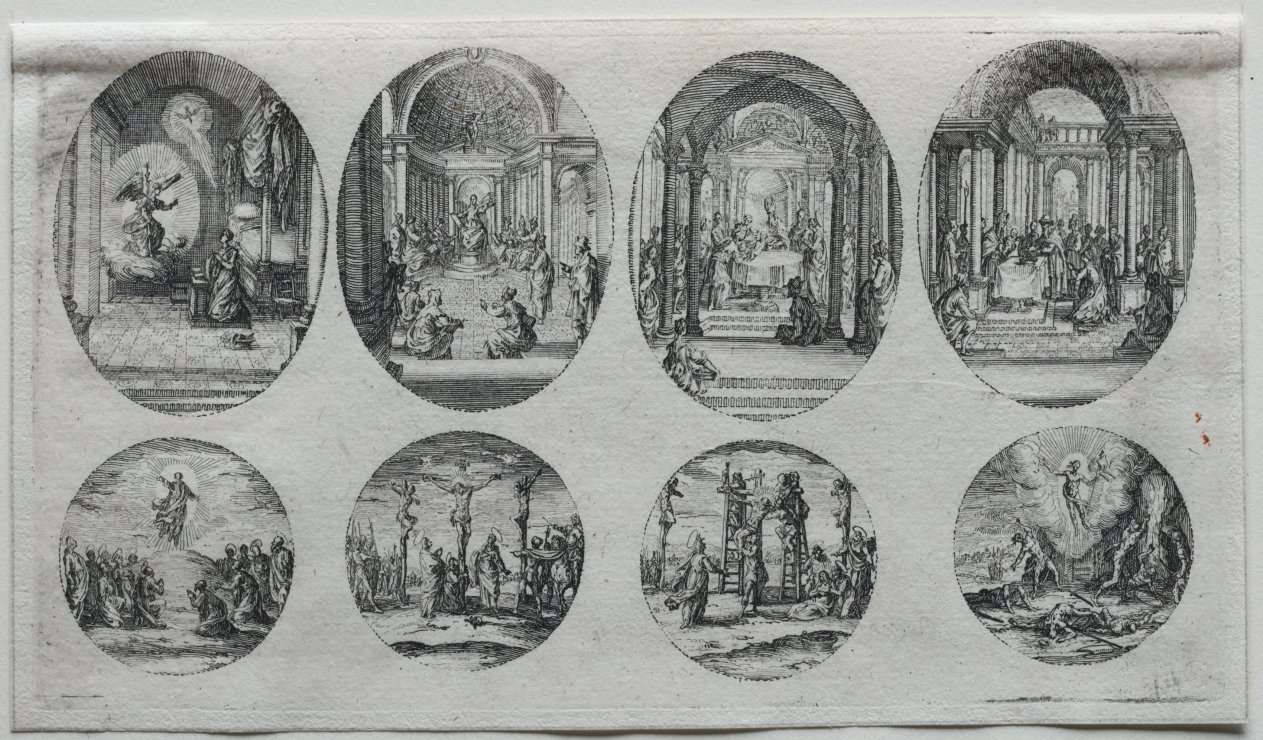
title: The Mysteries of the Passion: The Annunciation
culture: France, 17th century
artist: Jacques Callot (French, 1592–1635)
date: 1631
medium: etching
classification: Print